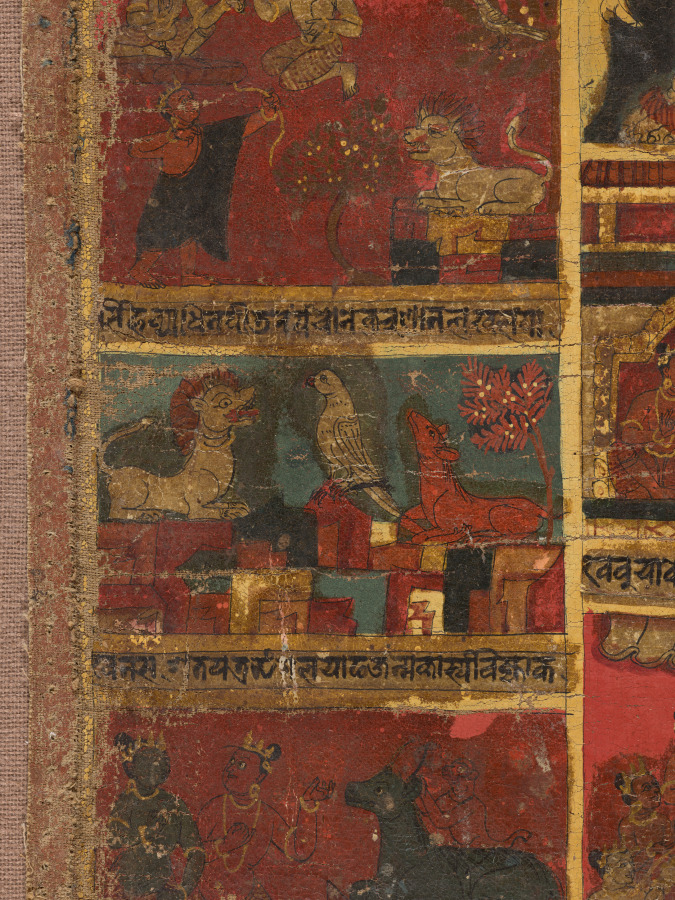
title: Bejeweled Buddha Preaching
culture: Nepal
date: 1648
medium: Gum tempera, ink, and gold on cloth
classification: Painting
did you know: Nepalese devotional paintings on cloth are called "paubha" in the Newari language.